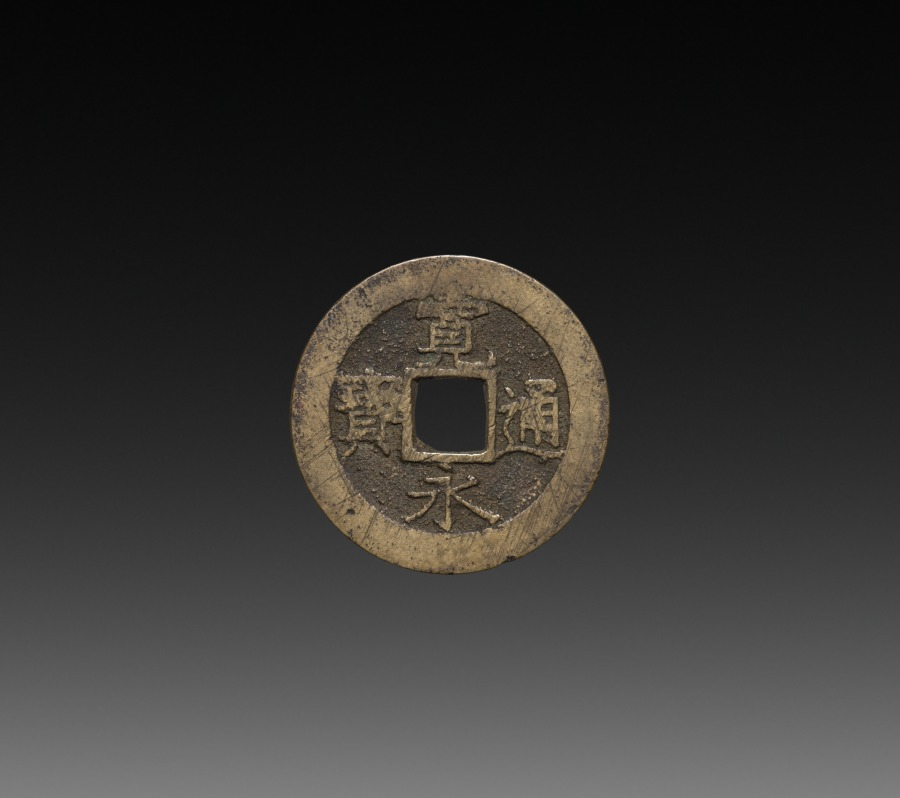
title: Four Mon Kan'ei Tsūhō Coin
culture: Japan, Edo period (1615–1868)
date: 1768–1868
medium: copper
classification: Coins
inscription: 寛永通寳